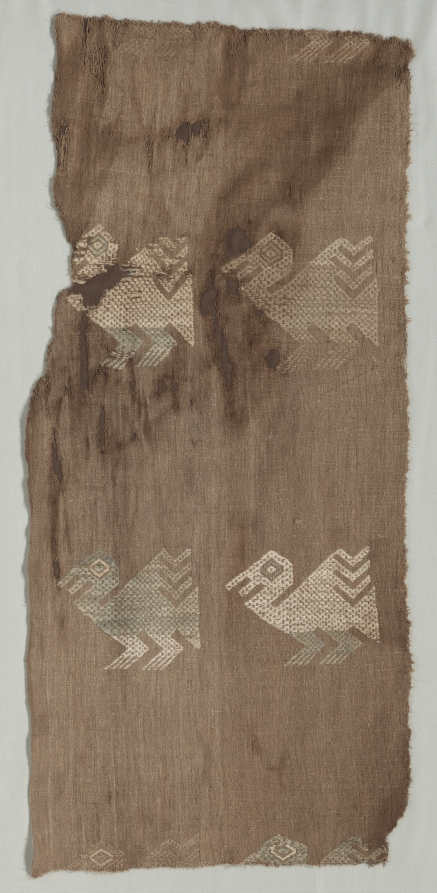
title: Fragment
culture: Peru, North Coast, Chimú Culture, 12th-15th century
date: c. 1100–1400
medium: plain cloth, brocaded; cotton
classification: Textile